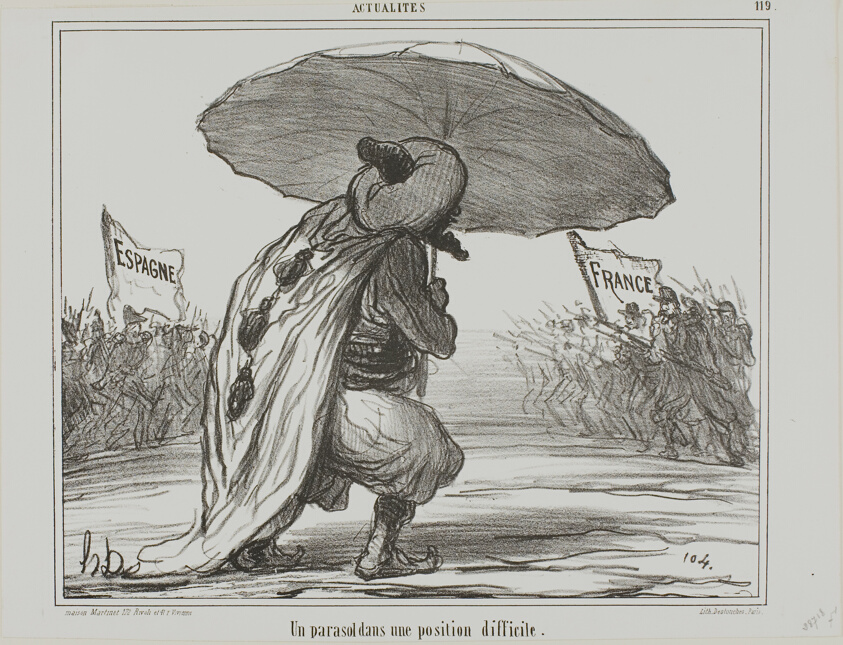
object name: Print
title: An Umbrella in a Difficult Position, plate 119 from Actualités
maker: Honoré Victorin Daumier; French, 1808-1879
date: November 25, 1859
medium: Lithograph in black on white wove paper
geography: France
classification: lithograph; print; prints and drawing